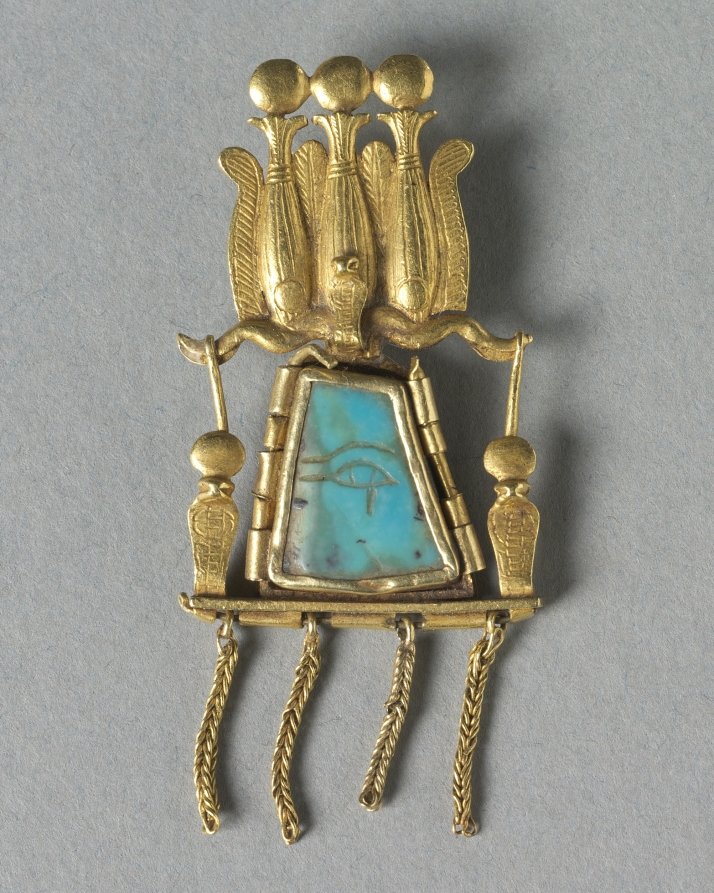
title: Pendant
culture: Egypt, Third Intermediate (1069–715 BCE), Dynasties 21–22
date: 1069–715 BCE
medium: gold and turquoise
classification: Jewelry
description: The rich gold and beautiful turquoise of this pendant make this piece of jewelry a visual delight. At the lower half one notices the fine braiding detail. The extravagant materials suggest it was made for a wealthy individual.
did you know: Turquoise is pretty but it was also thought to bring good luck.